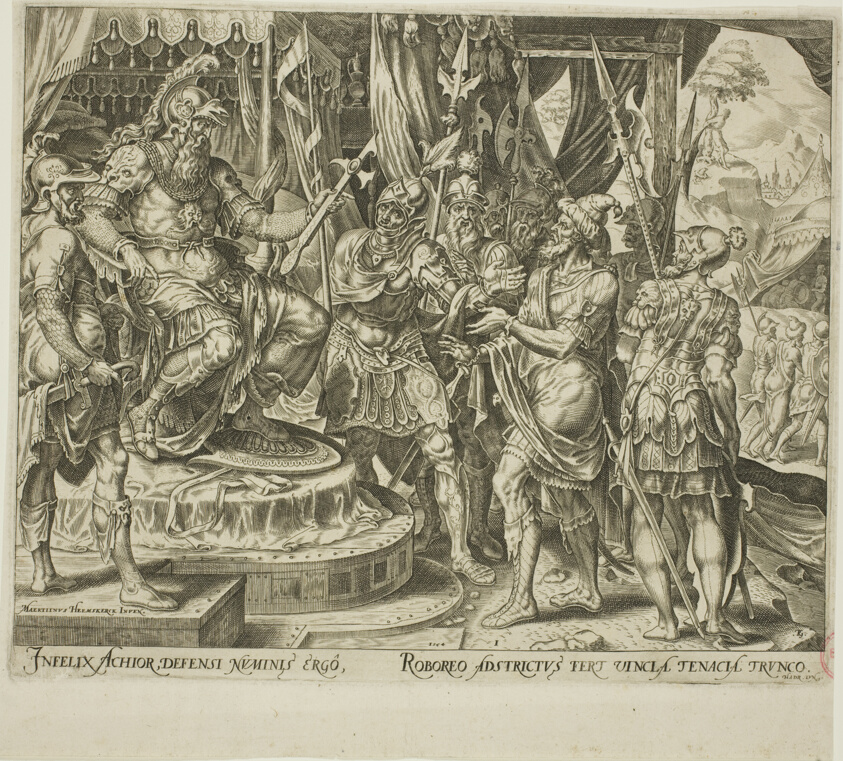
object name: Print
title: Achior Pleading with Holofernes for the Israelites, plate one from The Story of Judith and Holofernes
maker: Philip Galle (Netherlandish, 1537-1612); after Maarten van Heemskerck (Dutch, 1498-1574)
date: 1564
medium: Engraving in black on ivory laid paper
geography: Netherlands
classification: engraving; paper; print; prints and drawing